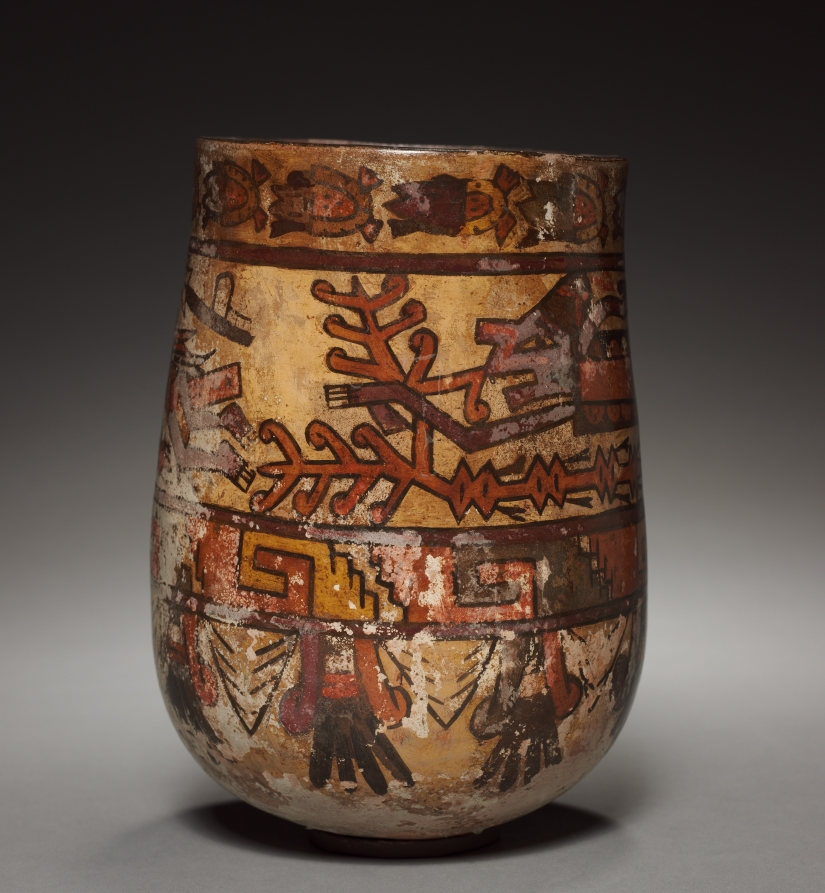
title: Vase with Trophy-heads and Warriors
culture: Peru, South Coast, Nasca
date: c. 450–600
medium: earthenware with colored slips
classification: Ceramic